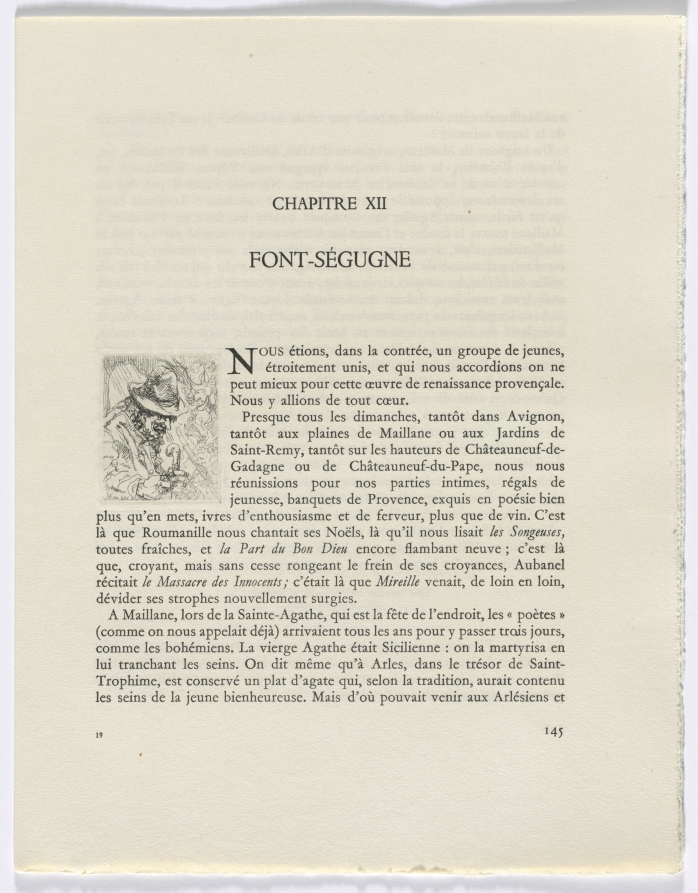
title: Frédéric Mistral: Mémoires et Recits by Frédéric Mistral: bust of old man (page 145)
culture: France, 20th century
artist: Auguste Brouet (French, 1872–1941)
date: 1937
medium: etchings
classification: Portfolio